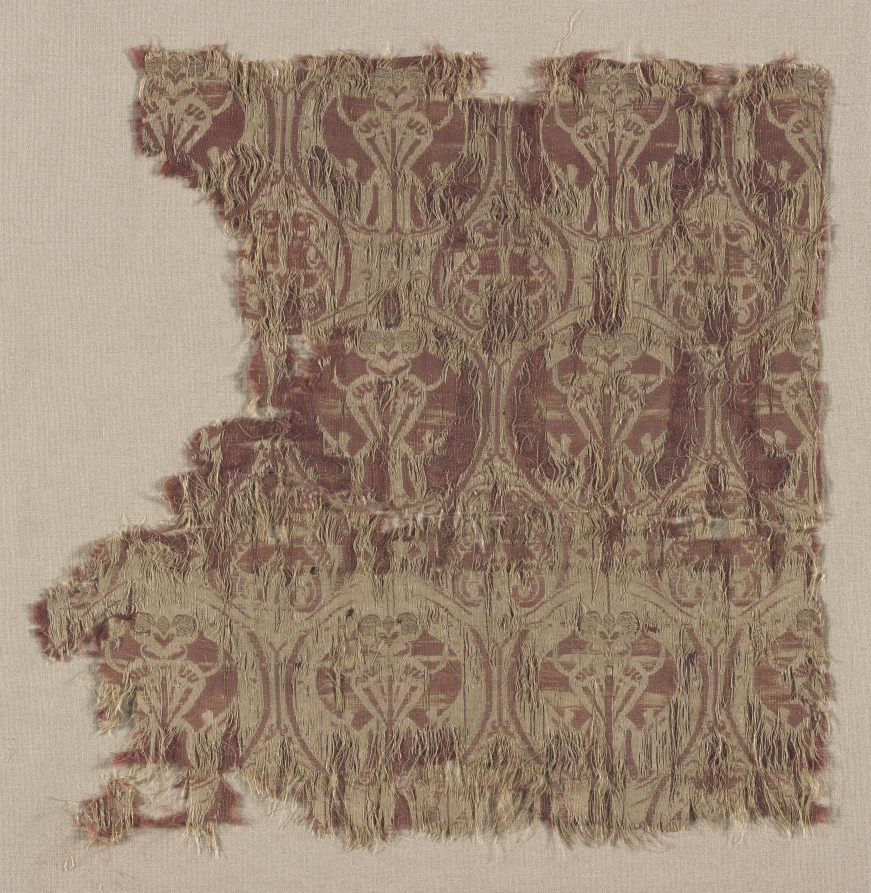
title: Silk Fragment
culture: Spain, Islamic period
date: 1150–1199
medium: lampas weave, brocaded; silk and gold thread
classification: Textile